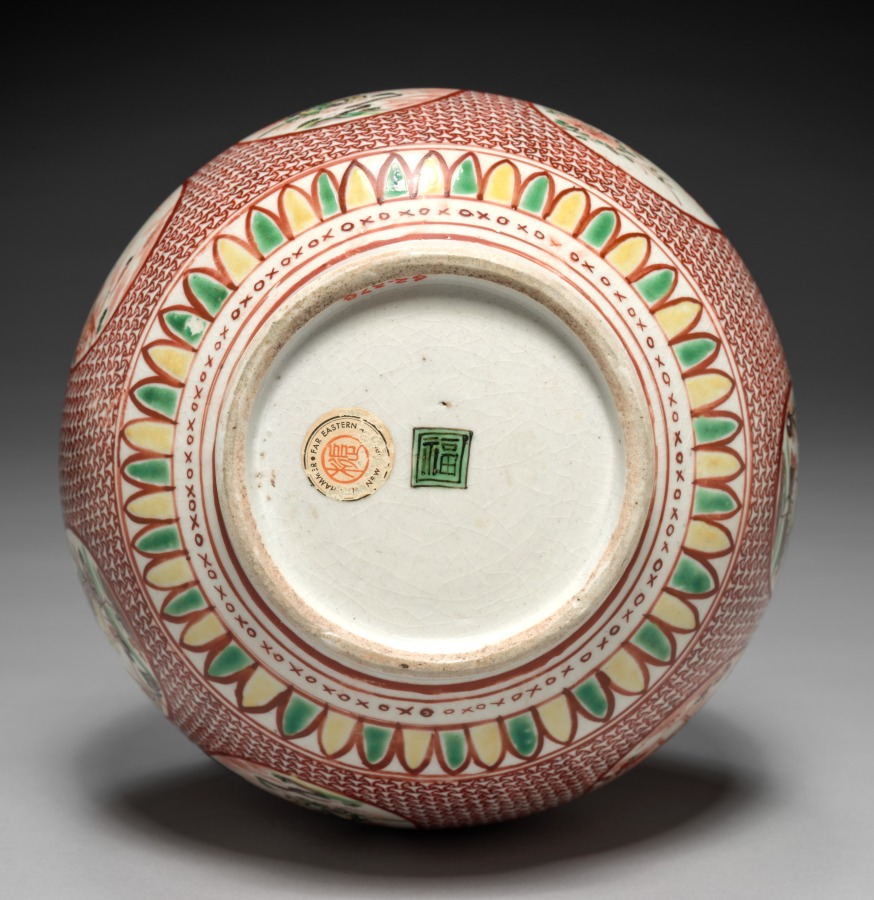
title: Vase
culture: Japan, Edo period (1615–1868)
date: late 1600s-early 1700s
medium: porcelain with decoration in colored enamels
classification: Ceramic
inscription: character "Fuku" (well-being) on base in black with green overglaze.